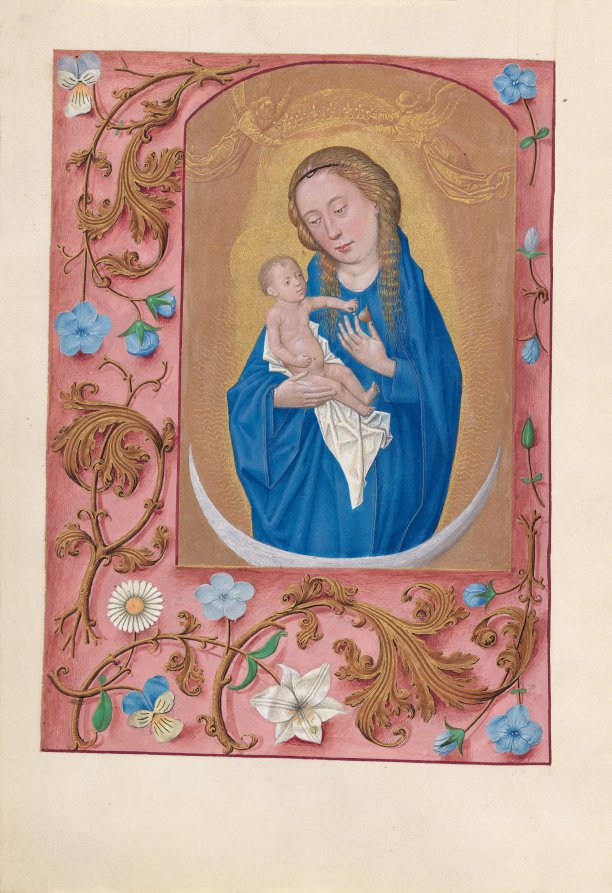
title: Hours of Queen Isabella the Catholic, Queen of Spain: Fol. 159v, Woman Clothed in the Sun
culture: Flanders, Ghent and Bruges, late 15th century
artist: Master of the First Prayerbook of Maximillian (Flemish, c. 1444–1519)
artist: and Associates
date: c. 1500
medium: ink, tempera, and gold on vellum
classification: Bound Volume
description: This manuscript was illuminated by a circle of at least five highly organized manuscript painters active in the Flemish cities of Ghent and Bruges. The principal illuminator was Alexander Bening, who painted the majority of the book's miniatures. Manuscripts produced by this circle of artists are renowned for the decoration of their borders, which typically feature a rich variety of realistically-painted flowers, birds, and butterflies. This prayer book, called a book of hours, was intended not for a cleric, but for the private devotions of a lay person-in this case, Isabella the Catholic, Queen of Spain (1451-1504). Isabella's coat of arms embellishes the book's frontispiece. It is unlikely that the book was commissioned by the Queen herself; rather, she probably received it as a diplomatic gift from someone courting her patronage, perhaps Cardinal Francisco Jimenez de Cisneros. A Franciscan friar, Jimenez was dependent upon Isabella for his advancement, first to the post of Queen's confessor in 1492, and then to Archbishop of Toledo in 1495.